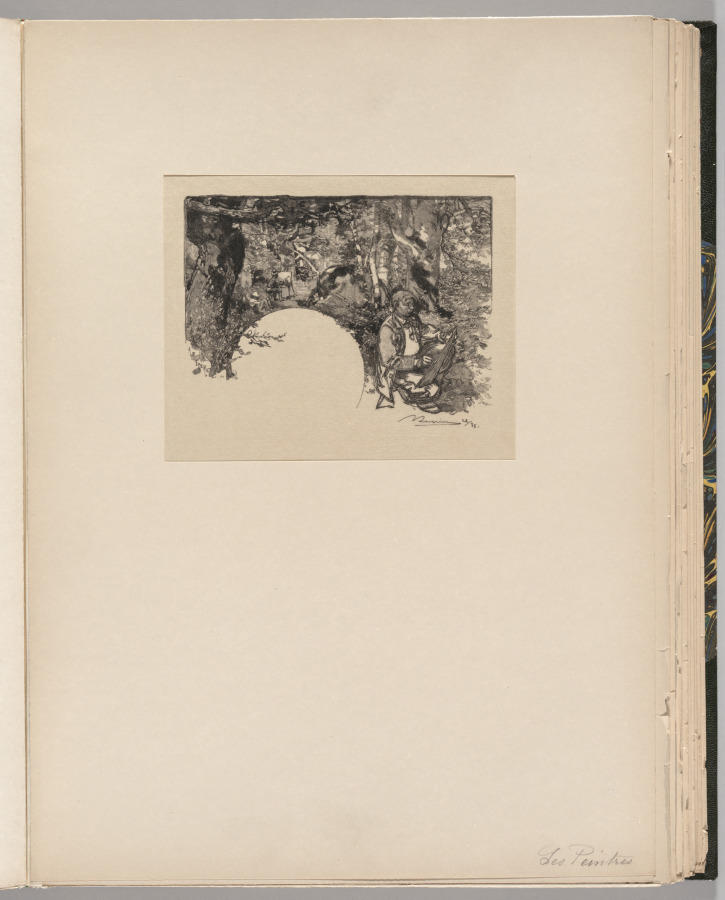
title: Fontainebleau Forest: The Painters (La Forêt de Fontainebleau: Les Peintres)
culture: France, 19th century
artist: Auguste Louis Lepère (French, 1849–1918)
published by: A. Desmoulins, Published in Revue Illustrée, 1887–90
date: 1890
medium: wood engraving from bound volume of 34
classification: Bound Volume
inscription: In block, lower left: A. LEPERE del. sc.; below image, lower right, in black ink: ALepère 22/35; on window mat, lower right, in graphite: Les Peintres